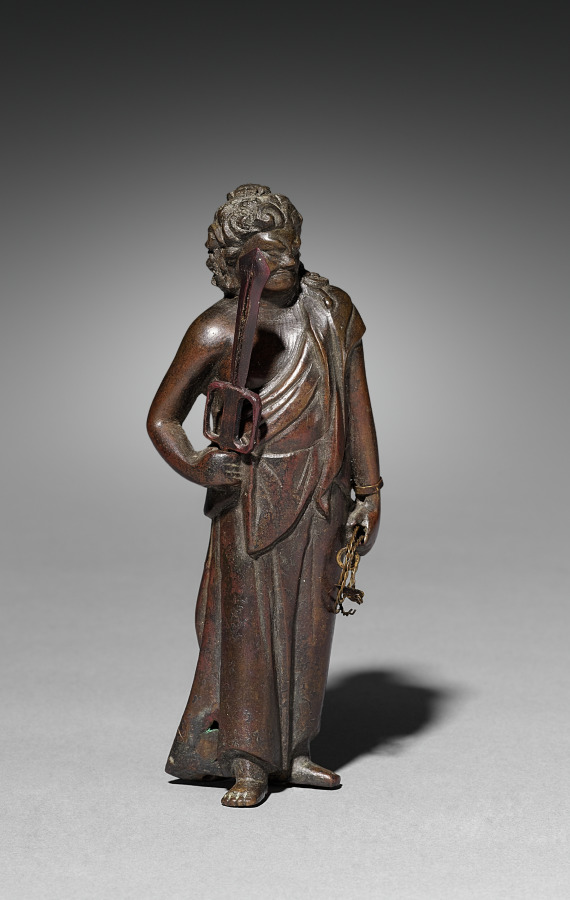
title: Fudō Myōō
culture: Japan, Kamakura period (1185–1333)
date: early 1300s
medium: bronze with wire attachments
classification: Sculpture